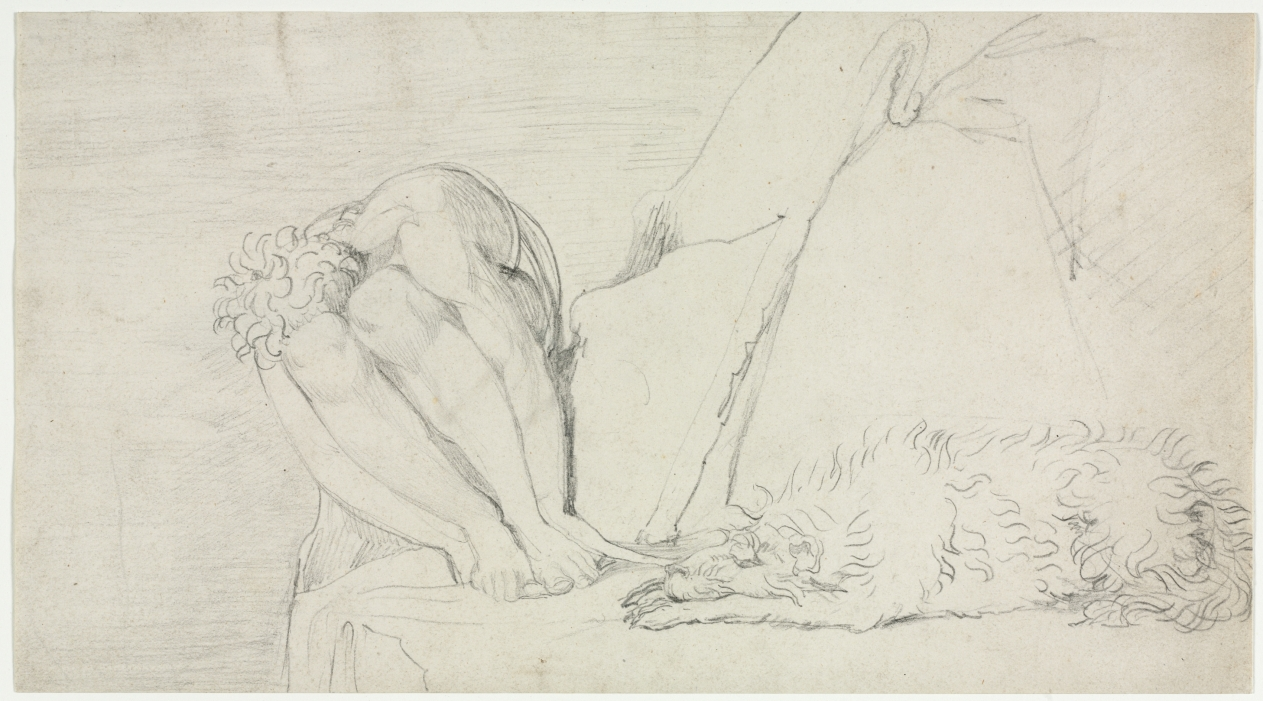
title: Sketch for "The Thought of Death alone, the Fear Destroys"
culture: England, 18th century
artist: William Blake (British, 1757–1827)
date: c. 1795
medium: graphite on paper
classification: Drawing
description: This sketch of a shepherd sleeping with his dog at the edge of a precipice relates to one of the nearly 550 watercolors that William Blake created for the 1797 edition of Edward Young’s The Complaint, and the Consolation; or, Night Thoughts, a long poem about death and salvation originally published in 1742–45. Blake worked extensively with books as an author and illustrator, and also engraved the work of others for publication. Night Thoughts was one of his most ambitious commercial projects. Unfortunately, only one of the four planned volumes was ever produced, since Richard Edwards, who had commissioned the work, closed his publishing business.